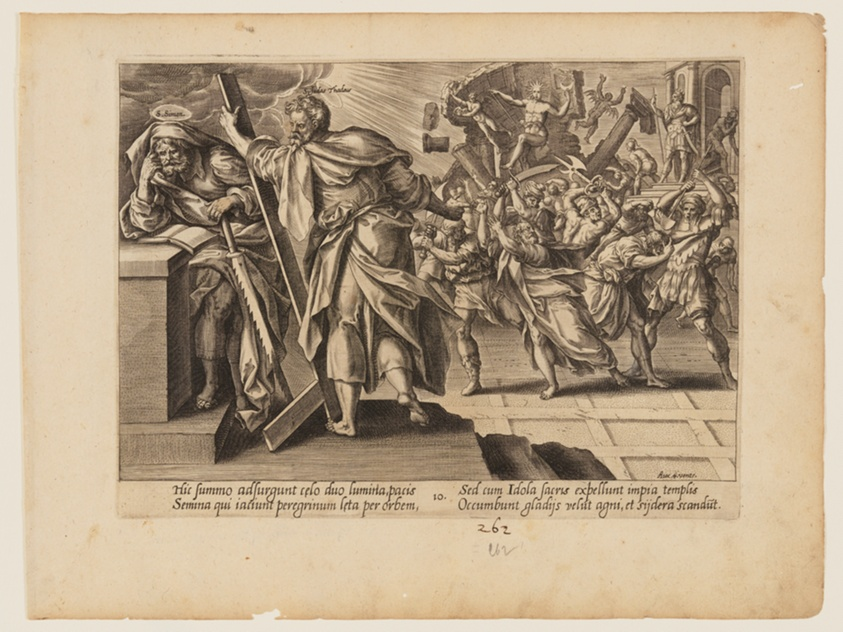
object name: Print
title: The Martyrdom of St Simon and Judas Thaddaeus, from The Martyrdom of Christ and the Apostles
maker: Hendrick Goltzius (Dutch, 1558–1617); after Maarten de Vos (Flemish, 1532–1603); published Hieronymus Cock (Netherlandish, c. 1510–1570)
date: c. 1578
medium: Engraving on ivory laid paper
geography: Netherlands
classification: engraving; paper; print; prints and drawing